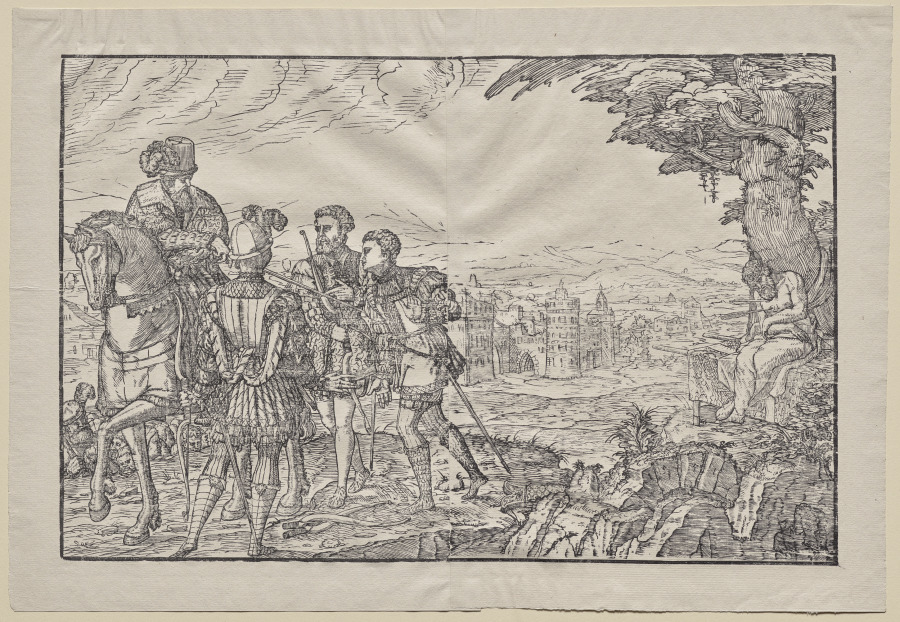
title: Le pere mort et ses trois fils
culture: Germany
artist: Melchior Lorck (Danish, 1526/27–after 1588)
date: 1551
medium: woodcut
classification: Print